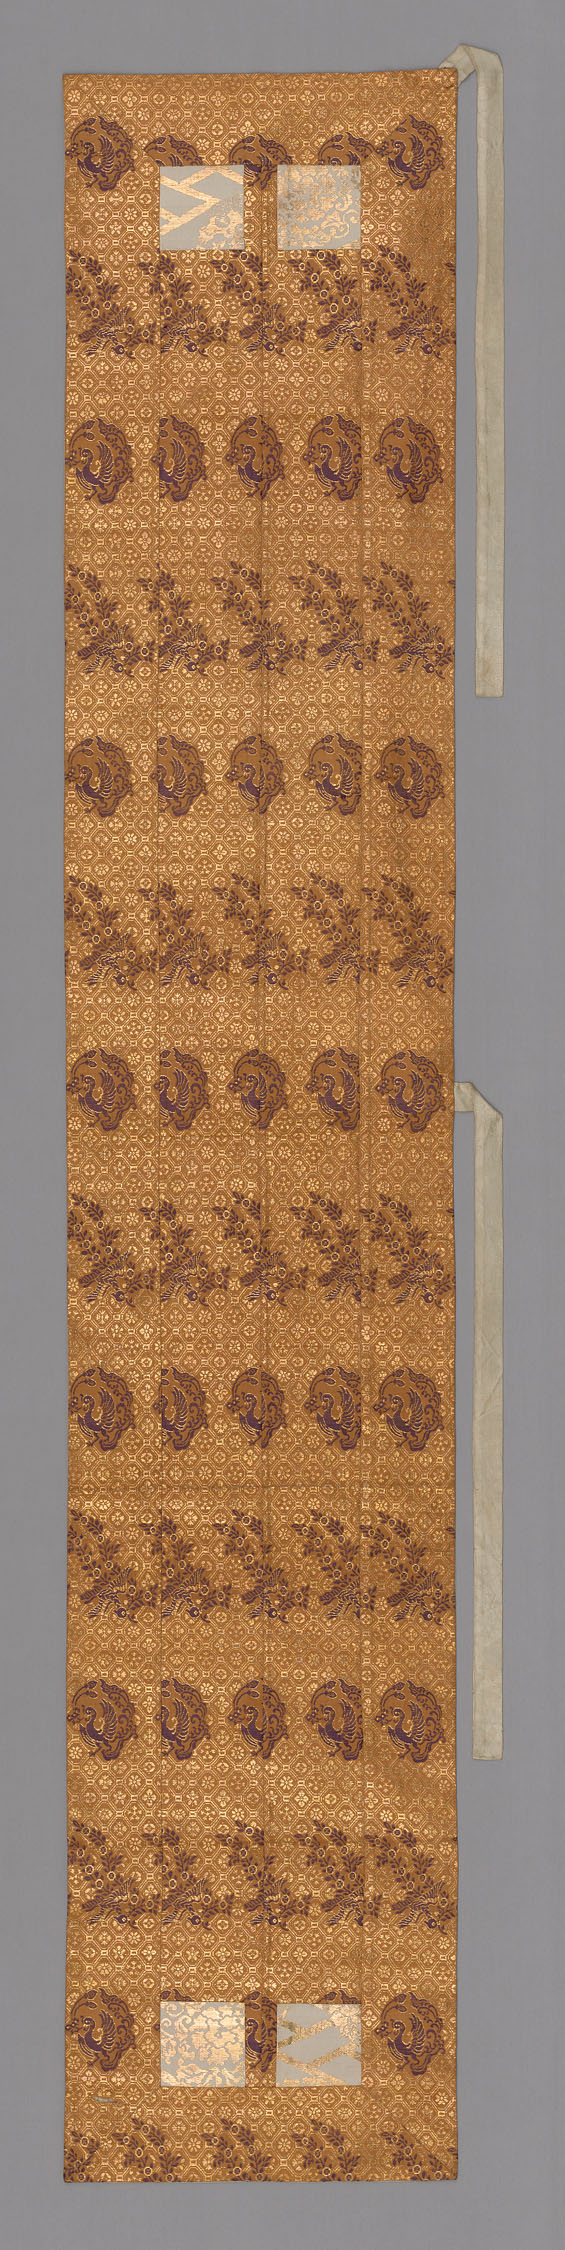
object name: Textile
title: Ôhi (Stole)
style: Japanism, meiji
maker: Japan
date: 1890/1906, Meiji period (1868–1912)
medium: Heri, jô: silk and gold-leaf-over-lacquered-paper-strip, warp-float faced 2:1 "Z’ twill weave with weft-float faced 1:2 'Z’ twill interlacings of secondary binding warps and supplementary patterning wefts; shiten: Silk and gold-leaf-over-lacquered-paper-strip, warp-float faced 2:1 'Z’ twill weave with weft-float faced 1:2 'Z’ twill interlacings of secondary binding warps and supplementary patterning wefts; llining: silk, 5:1 twill damask weave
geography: Japan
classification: textile; liturgical - buddhist; weaving